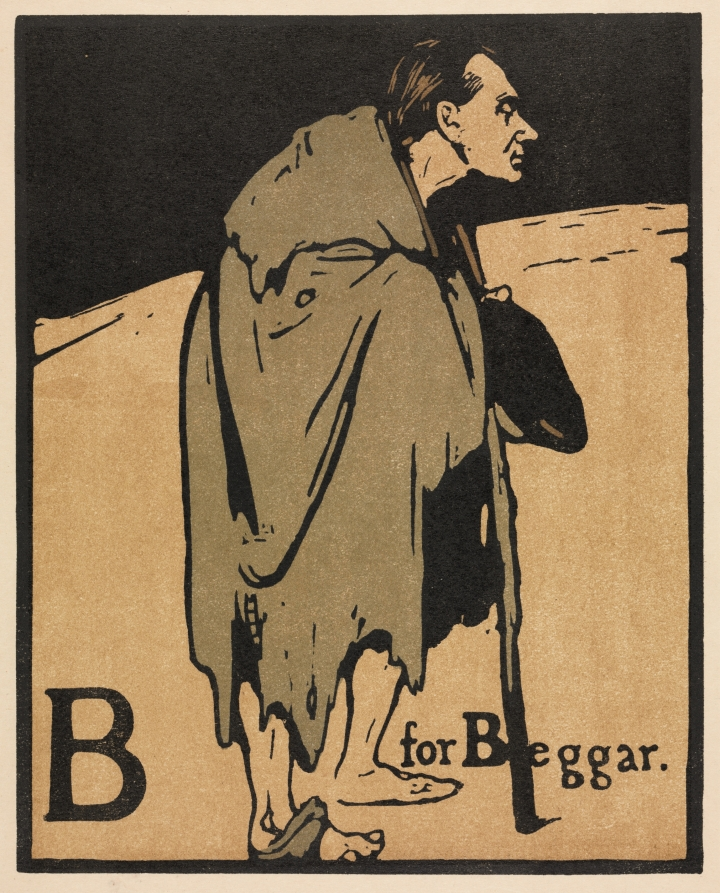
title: An Alphabet: B is for Beggar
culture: England, 19th century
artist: William Nicholson (British, 1872–1949)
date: 1897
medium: color lithograph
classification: Print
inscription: Lower left, in pencil: "This is Pryde, Nicholson's partner as "Beggarstaff Brothers" 50."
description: Nicholson, like so many European and American artists at the time, was influenced by the nontraditional aspects of Japanese art. As in ukiyo-e, Japanese color woodcuts, Nicholson used a limited color scheme and simplified forms, silhouetting his subjects on solid backgrounds that flatten space. An Alphabet was the first of several sets of prints Nicholson made for the publisher William Heinemann, who was not solely motivated by profit; he found books a source of intellectual pleasure and, as a cultured man with cosmopolitan tastes, appreciated Nicholson’s bold and witty designs. Nicholson cut woodblocks for the images that were first issued in a small edition of hand-colored woodcuts. The designs were then published in large editions as color lithographs.